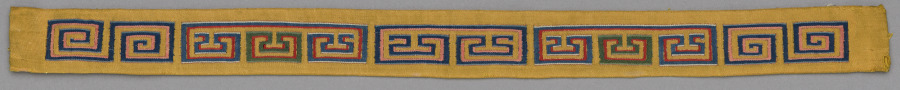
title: Cushion Cover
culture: China, Qing dynasty (1644-1911)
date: 1700s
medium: silk, metallic thread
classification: Textile